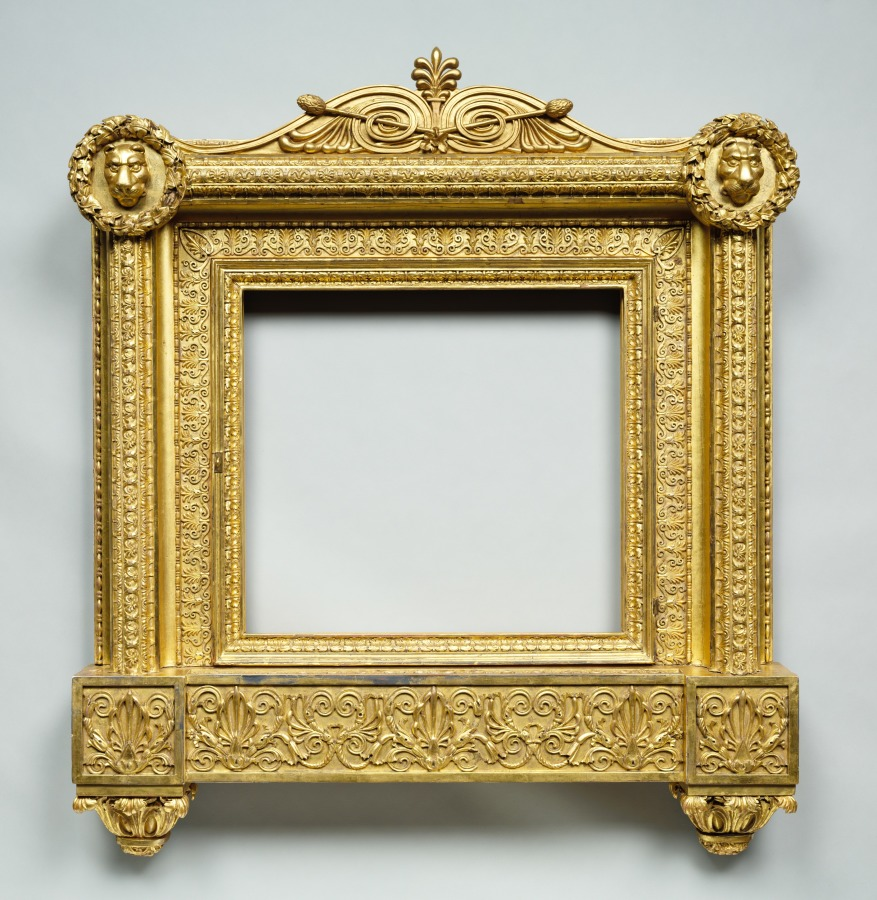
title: Bacchus and Ariadne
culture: England, 19th century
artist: Henry Bone (British, 1755–1834)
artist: after Titian (Italian, c. 1488–1576)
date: 1808–11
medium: enamel, in original gilt-wood and gesso carved frame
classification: Miniature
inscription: Signed and dated H Bone, 1811 on the recto (on the urn, lower left), inscribed on frame mat at bottom right: ENAMEL HBONE, and signed, dated and inscribed in full on the counter-enamel "painted by Henry Bone R.A. Enamel painter in Ordinary to His Majesty and Enamel painter to His Royal Highness the Prince of Wales, after the Original by Titian in the Collection of the Rt: Honble: Lord Kinnaird &c &c &c.____ This Picture the most celebrated amongst the Bacchanalian Subjects of Titian (when patronis'd by Alphonso Duke of Ferrara) was ultimately brought to this Country from the Villa Aldobrandini in Rome in 1806, from whence it was imported by Willm. Buchanan Esq.____ Size of the Original 6 feet 2 inches, by 5 ---- 10 ---- This Enamel picture w[as] began July 30th 1808 and finish'd March 1811. ___ (HB. Elected a Royal Academician Feby. 11th 1811)"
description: Henry Bone devoted three years to creating this work, a tremendous technical achievement and the largest enamel on copper that had ever been made. The painstaking process required each application of color to be fired at a different temperature in the kiln. The enamel exactly reproduces Titian’s Bacchus and Ariadne (now in the National Gallery, London), an early sixteenth-century Italian masterpiece that had recently come into an English collection. The elaborate carved and gilded wood frame was specially designed for the work, an indication of the cultural value placed on great enamel reproductions of famous paintings. Bone was unable to show his masterwork at the annual Royal Academy exhibition in 1811 because the Prince of Wales had asked to see it. When the prince decided not to purchase it, Bone issued more than 4,000 tickets for visitors to view the work in his studio.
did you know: Henry Bone was known for his enamel paintings created through a laborious process of fusing painted glass to copper and firing at controlled temperatures.